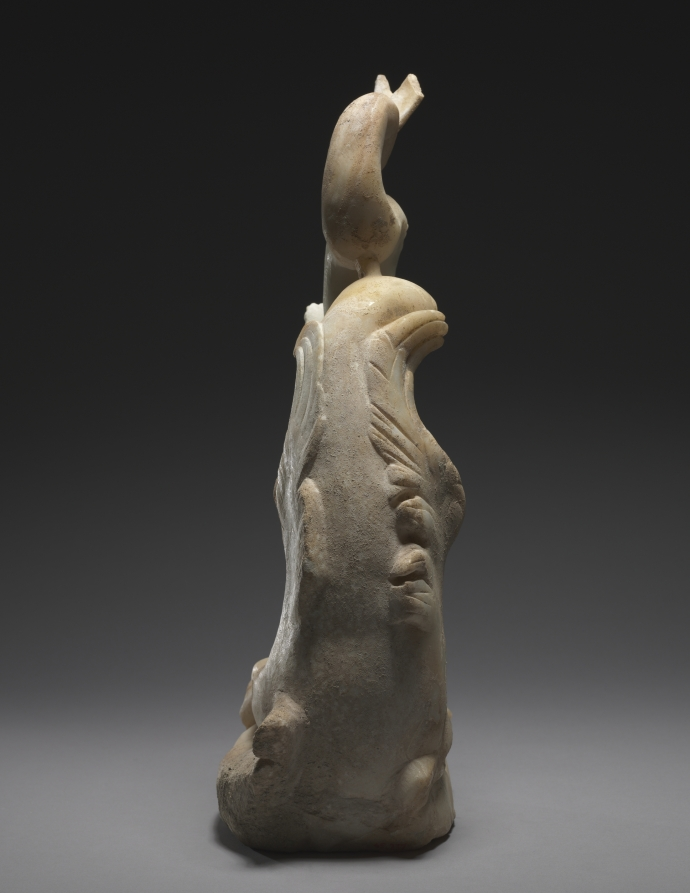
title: Jonah Swallowed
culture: Anatolia, late Roman-early Christian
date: 280–90 CE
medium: marble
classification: Sculpture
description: After disobeying the Lord’s command to proclaim judgment on the city of Nineveh, the Old Testament prophet Jonah was cast into the sea and swallowed by a sea monster. Here, the beast swallows Jonah headfirst.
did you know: Although usually thought of as a whale, here the artist has depicted Jonah swallowed by a cetus, a large, monstrous sea creature.